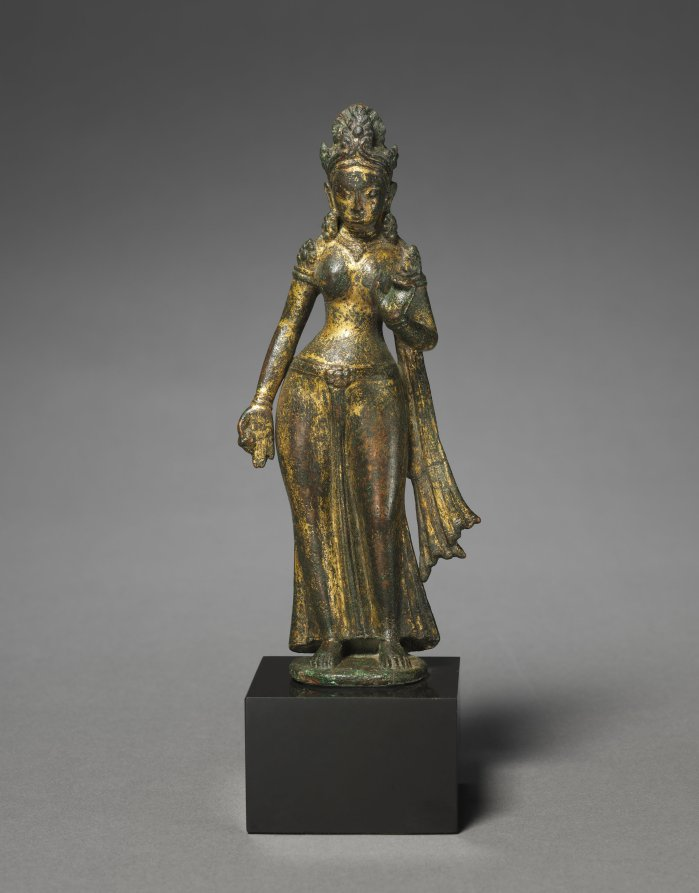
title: Devi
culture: Nepal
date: 600s–700s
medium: gilt bronze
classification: Sculpture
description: Exuding power and grace this diminutive image of a goddess is one of the earliest surviving bronze sculptures from Nepal. Her broad hips and simple, elegant garments and jewelry barely interrupt the contours of her form. Her lowered right hand, in the gift-giving gesture, holds a fruit, and her left hand once held the stem of a flower.